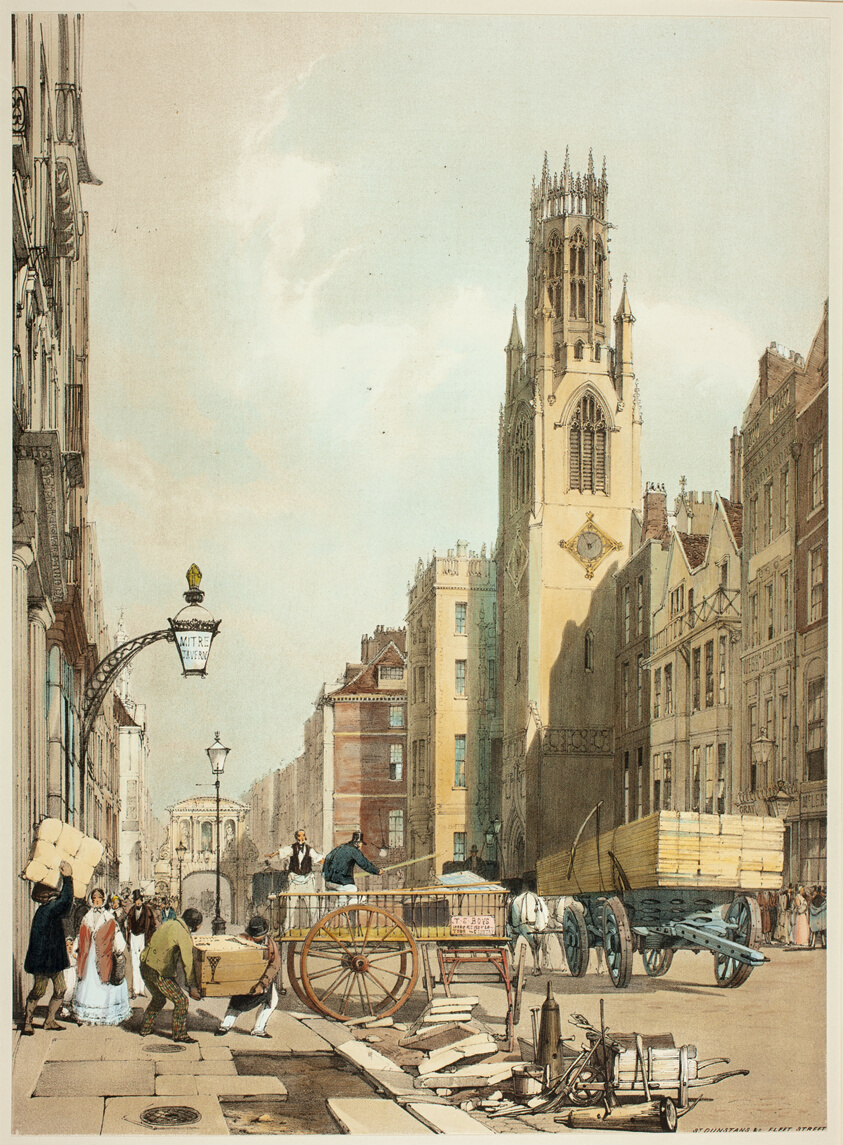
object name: Print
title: St. Dunstans Fleet Street, plate 23 from Original Views of London as It Is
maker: Thomas Shotter Boys (English, 1803-1874); designed by Charles Ollier (English, 1788-1859)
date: 1842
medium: Hand-colored lithograph on paper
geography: England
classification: lithograph; print; prints and drawing